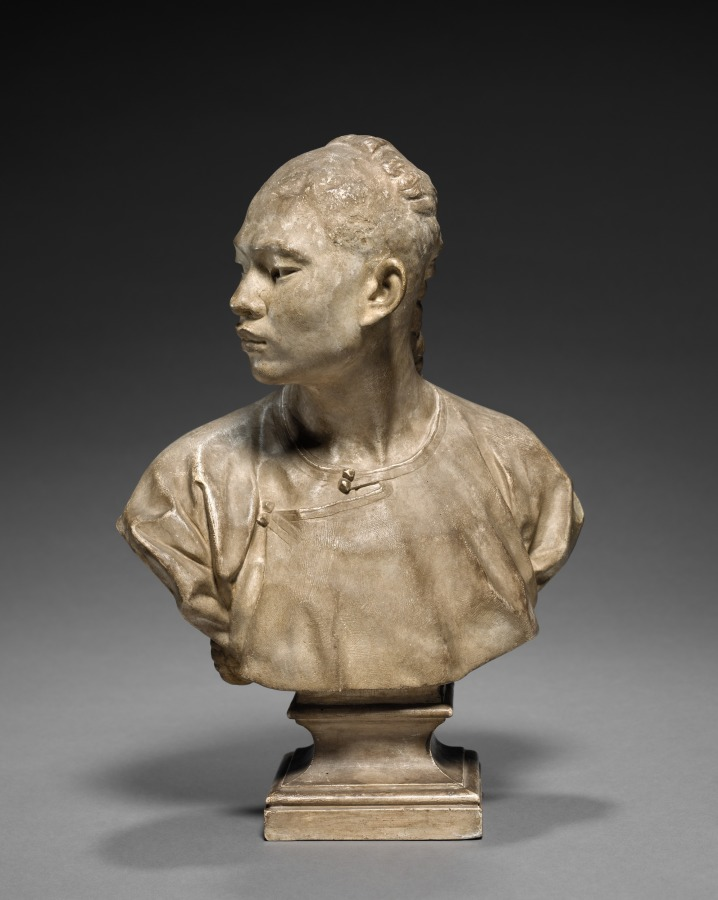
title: Bust of a Chinese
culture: France, 19th century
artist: Jean-Baptiste Carpeaux (French, 1827–1875)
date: 1867–68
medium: plaster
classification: Sculpture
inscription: inset into bust near base at rear is struck copper plate inscribed: "PROPRIETE CARPEAUX" with an eagle in the center.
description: This bust is related to the allegorical figure of Asia in Carpeaux's monumental bronze fountain, The Four Parts of the World Upholding the Celestial Sphere, commissioned by Baron Haussmann in 1867 for the Luxembourg Gardens in Paris. The figure was changed into a woman in the fountain and reflects the artist's interest in accurately portraying different ethnic groups. This bust exists in various sizes and media.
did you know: Greatly admired during his time, Jean-Baptiste Carpeaux received important commissions from French Emperor Napoleon III and Baron Georges-Eugène Haussmann.